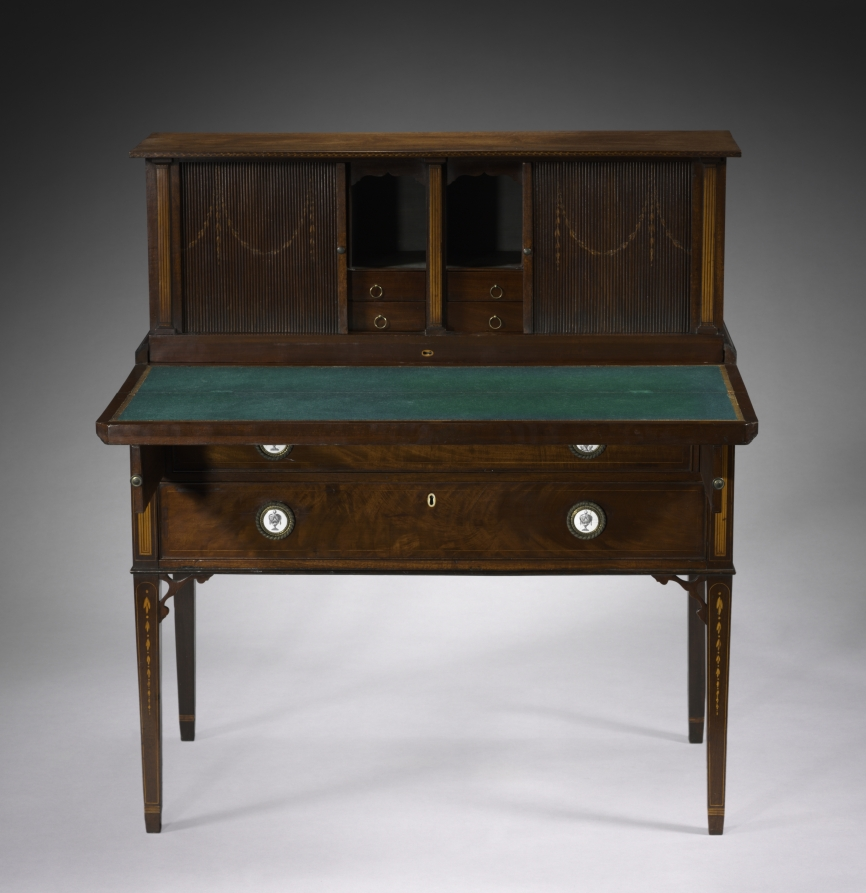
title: Tambour Desk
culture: America, Boston, early 19th Century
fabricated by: John Seymour (American, 1738–1818)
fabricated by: Thomas Seymour (American, 1771–1848)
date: c. 1800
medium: mahogany, brass and enamel pulls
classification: Furniture and woodwork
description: The severely rectilinear form, delicate inlay, sliding tambour doors, and blue-painted interior of this small desk relate it to the work of the English-born cabinetmaker John Seymour and his son, Thomas, who were in partnership in Boston during the years around 1800. The Seymours made some of the most sophisticated American furniture in the Hepplewhite style, so-called from the Englishman whose publication of furniture designs was widely influential on both sides of the Atlantic.